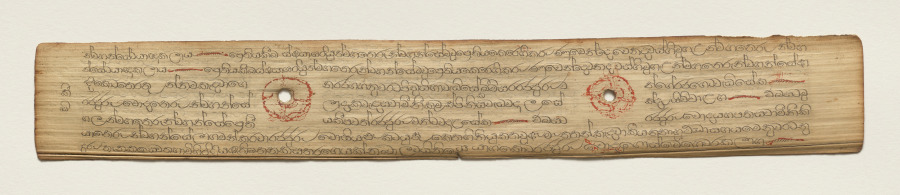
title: Leaf from a Buddhist Manuscript (recto)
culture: Sri Lanka, Singhalese, Late 17th century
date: c. 1700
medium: fiber paper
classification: Manuscript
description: Palm leaf material is still used for manuscripts in Sri Lanka. The palm leaves are prepared first by boiling them, drying them in the sun, and then rubbing them with oils. Scribes then use a metal stylus to incise the text. Then charcoal powder is wiped across the pages, filling in only the inscribed lines.